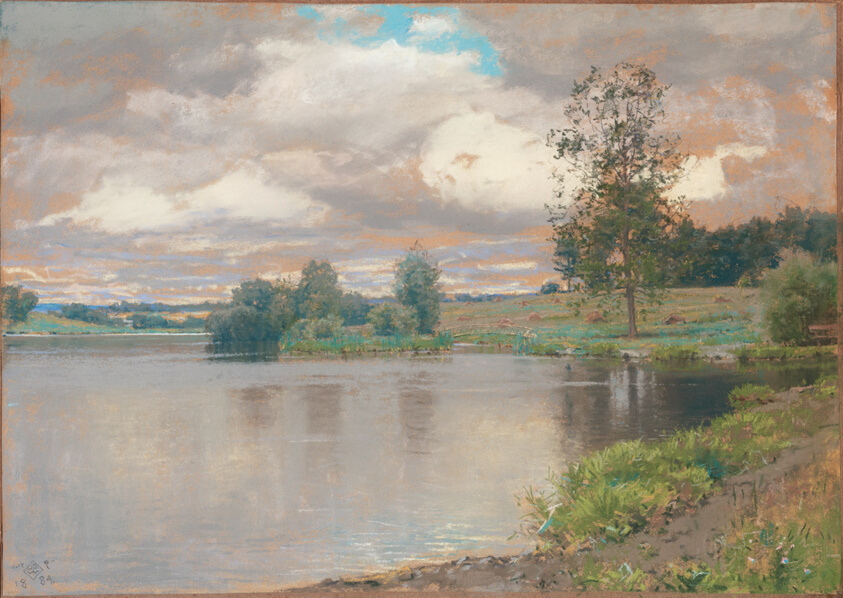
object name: Drawing and Watercolor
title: Lake at Appledale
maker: Walter Launt Palmer (American, 1854-1932)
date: 1884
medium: Pastel on tan wove paper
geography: United States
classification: drawings (visual works); pastel; prints and drawing